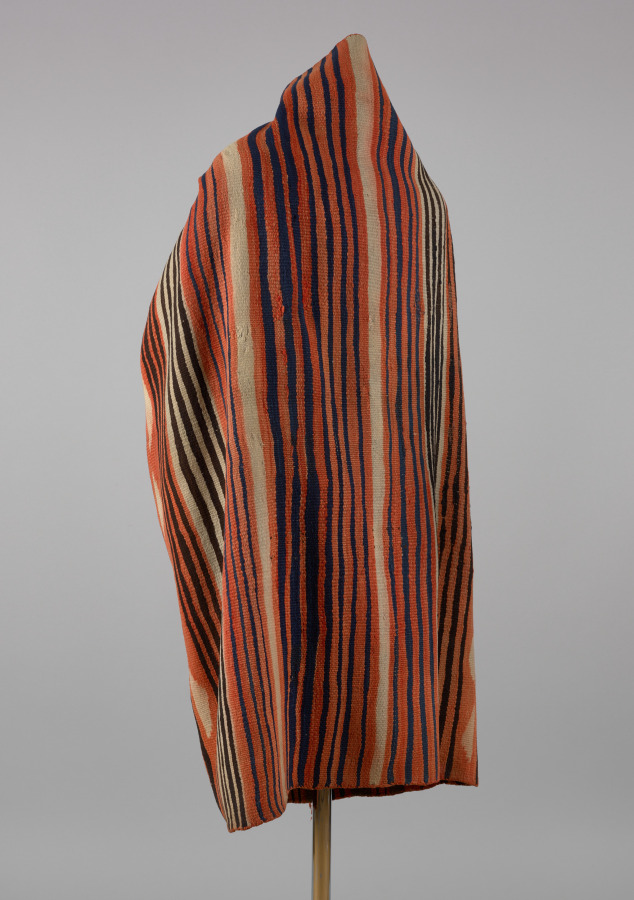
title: Banded Wearing Blanket (Diyugi)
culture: America, Native North American, Southwest, Diné (Navajo) or Zuni Pueblo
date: c. 1880–90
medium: Wool (handspun and bayeta): tapestry weave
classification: Textile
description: This blanket was created during the late 1800s, when weavers in the Southwest began to shift from making garments for Indigenous use, including trade, to additionally create items for non-Native collectors. In this new market, traditional wearing blankets, which were worn around the shoulders, were marketed as rugs.